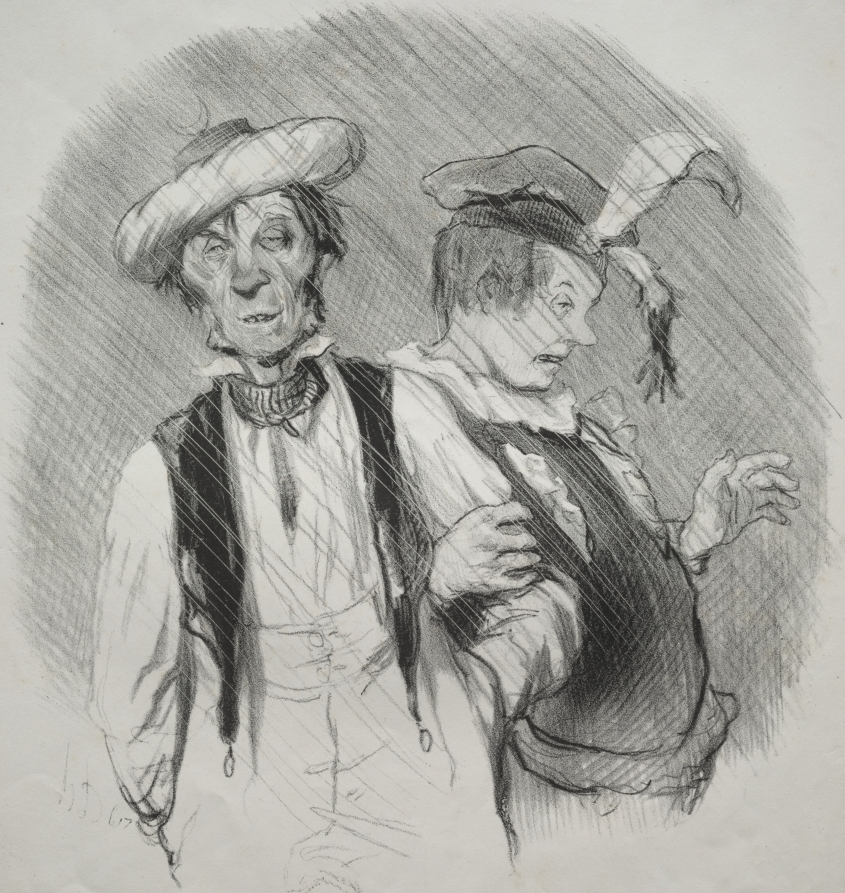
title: Mardi Gras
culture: France, 19th century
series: The Best Days in Life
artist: Honoré Daumier (French, 1808–1879)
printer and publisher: Aubert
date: 1844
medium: lithograph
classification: Print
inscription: Above image, printed: LES BEAUX JOURS DE LA VIE / No. 18 ; Below image, printed: LE MARDI GRAS / -Dis-donc.... Balandier.... j'crois qu'y pleut?... / -Tu te trompes... Moussard... y m' semble au contraire que je viens d'attraper un coup de soleil!....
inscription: Upper margin, in pencil: 2000 LeG v. 3-4 / also with text 742 18/100 ; lower margin, printed: Chez Aubert & Cie. Pl. de la Bourse, 29 / Imp. d'Aubert & Cie. ; in pencil: H.D. 742 / (Le G-26-180) 9 Aug. 1844 / D.IV. 1105 - II/II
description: This print was published in Le Charivari (August 9, 1844) as plate 18 from the series The Best Days in Life.